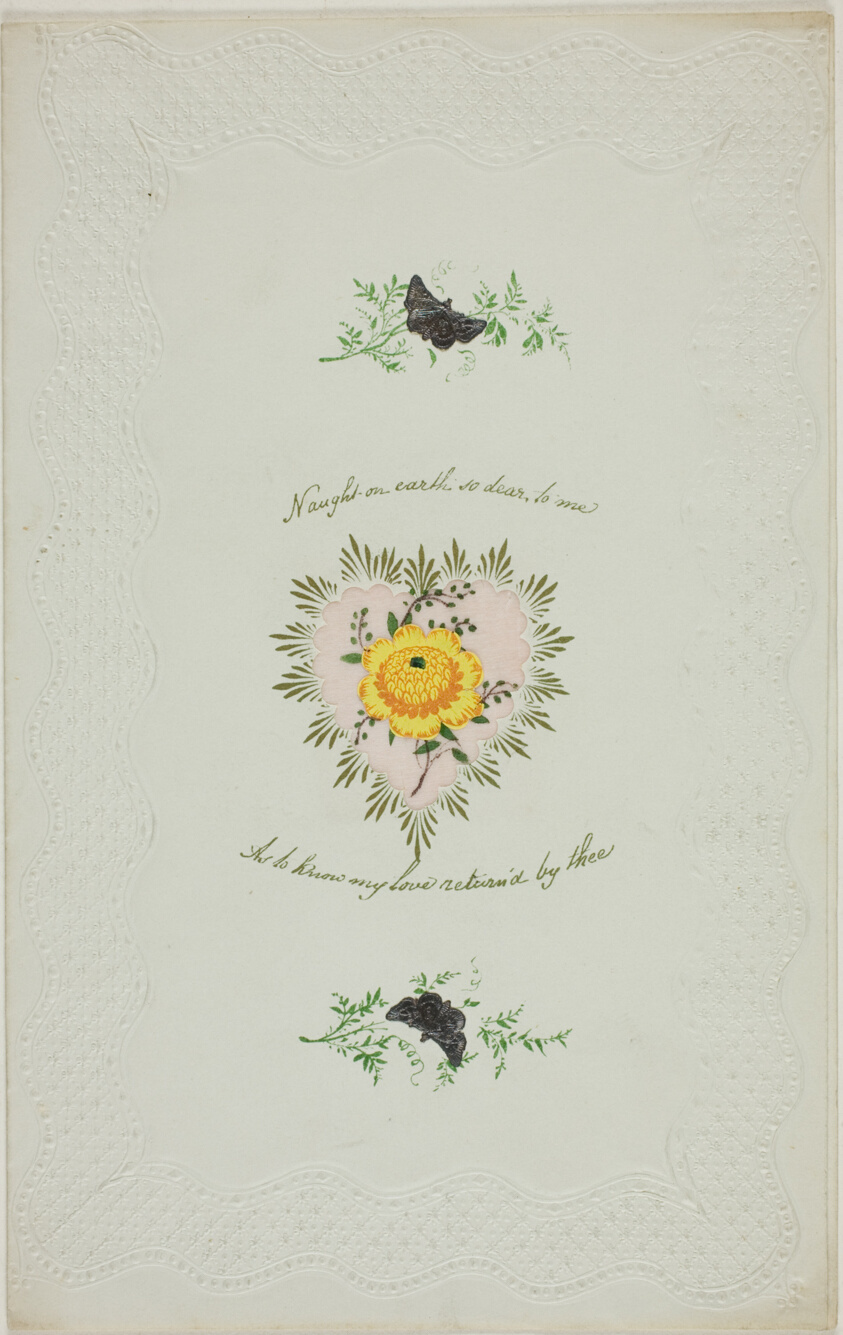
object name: Drawing and Watercolor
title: Naught on Earth So Dear to Me (valentine)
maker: Unknown Artist; English, 19th century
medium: Collaged elements on color lithograph on cut and embossed off-white wove paper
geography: England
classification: valentine; prints and drawing; paper